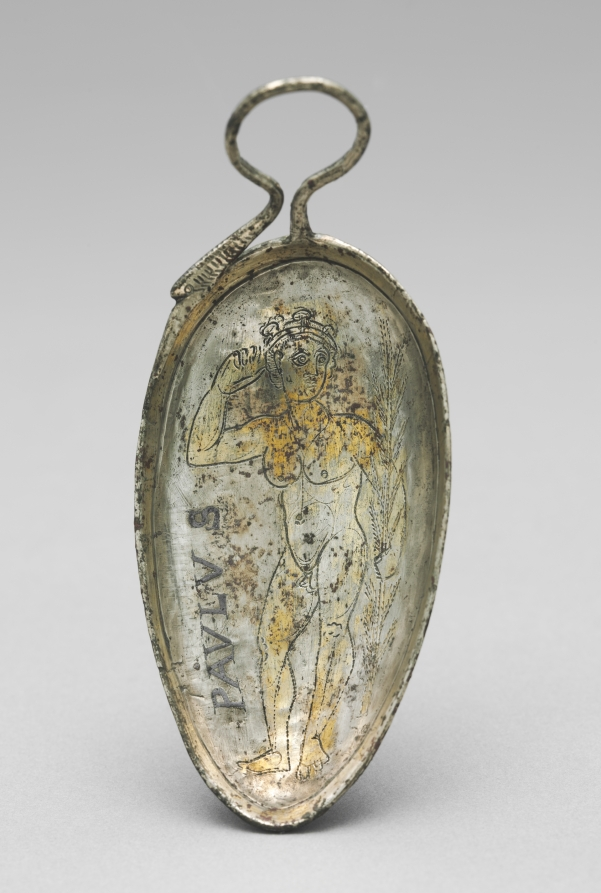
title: Spoon with Saint Paul as an Athlete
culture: late Roman Empire, perhaps Syria, early Byzantine, 4th century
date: 350–400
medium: silver, silver gilt, and niello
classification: Metalwork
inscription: the interior of the bowl contains an inscription filled with niello giving the Latin name of "PAVLVS."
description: Silver spoons with swan neck handles (ligulae) were popular in the Late Roman Empire. This late antique spoon is unique because it is decorated with the nude figure of a victorious athlete identified in an inscription as PAVLVS (Paul). It is tempting to interpret the juxtaposition of the name with a classical representation of an athlete as a subtle allusion to a passage in Saint Paul’s first letter to the Corinthians (1 Cor. 9:24-27), in which the apostle characterizes himself as an "athlete of Christ." While this interpretation may imply that the spoon’s owner was a Christian, it does not imply a religious function for the object, which was likely used for display or fine dining.